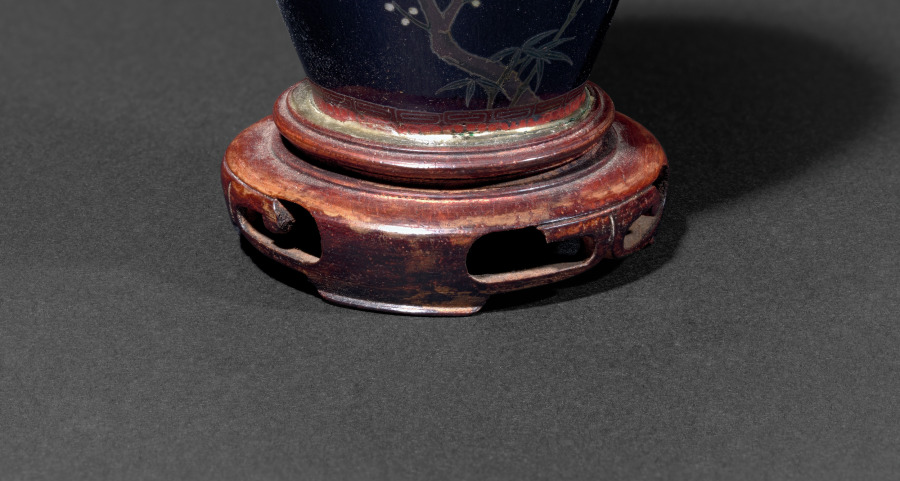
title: Vase (base)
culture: Japan, Meiji period (1868–1912) or Taishō period (1912–26)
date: early 1900s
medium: wood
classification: Enamel